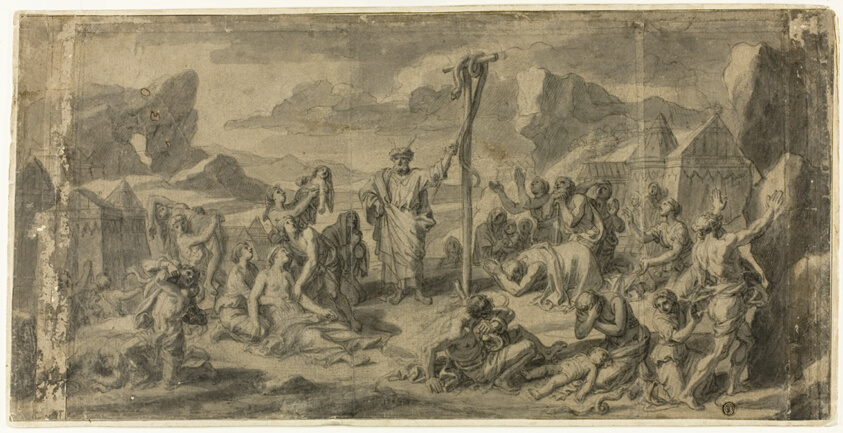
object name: Drawing and Watercolor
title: Moses and the Brazen Serpent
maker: François Verdier (French, 1651-1730)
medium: Black crayon and brush and black and gray wash, heightened with traces of white gouache, on tan laid paper (pieced together), laid down on tan wove card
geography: France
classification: pen and ink drawings; drawings (visual works); prints and drawing